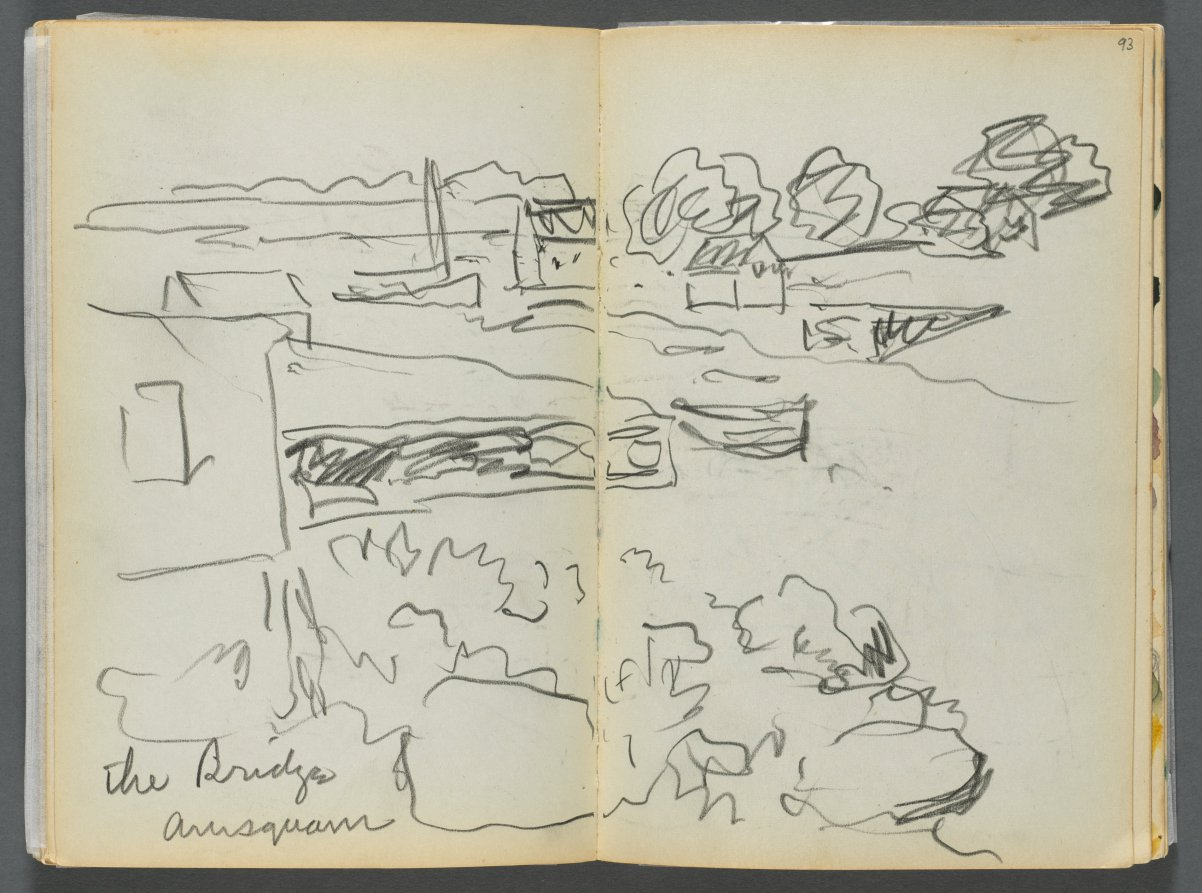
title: Sketchbook- The Granite Shore Hotel, Rockport, page 092 & 93: "The Bridge , Annisquam"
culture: America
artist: Maurice Prendergast (American, born Newfoundland [now Canada], 1858–1924)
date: 1905–10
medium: graphite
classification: Bound Volume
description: This sketchbook contains 72 pages of pencil drawings and 9 watercolors of Cape Ann. On the inside of the cover Prendergast wrote the address of the Granite Shore Hotel in Rockport, Massachusetts.